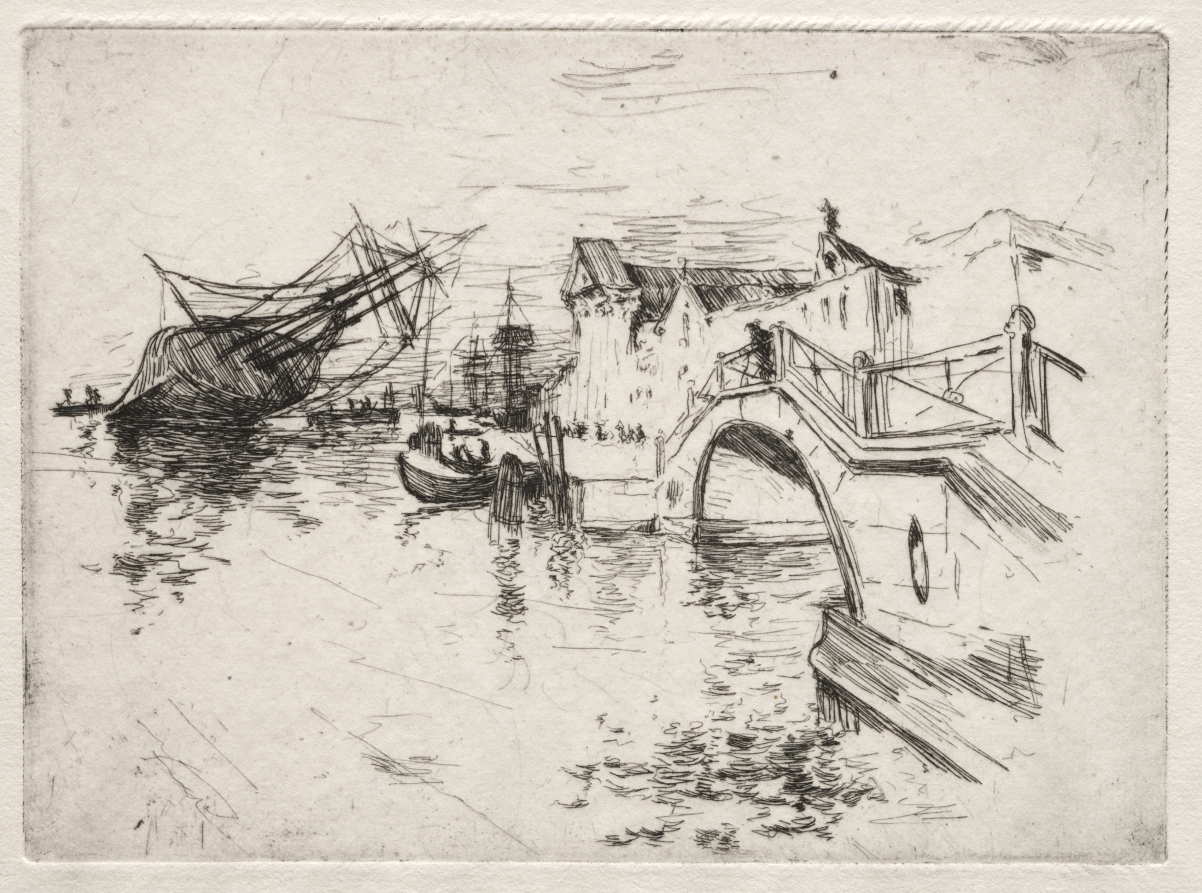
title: Venice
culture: America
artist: John Henry Twachtman (American, 1853–1902)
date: c. 1880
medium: etching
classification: Print